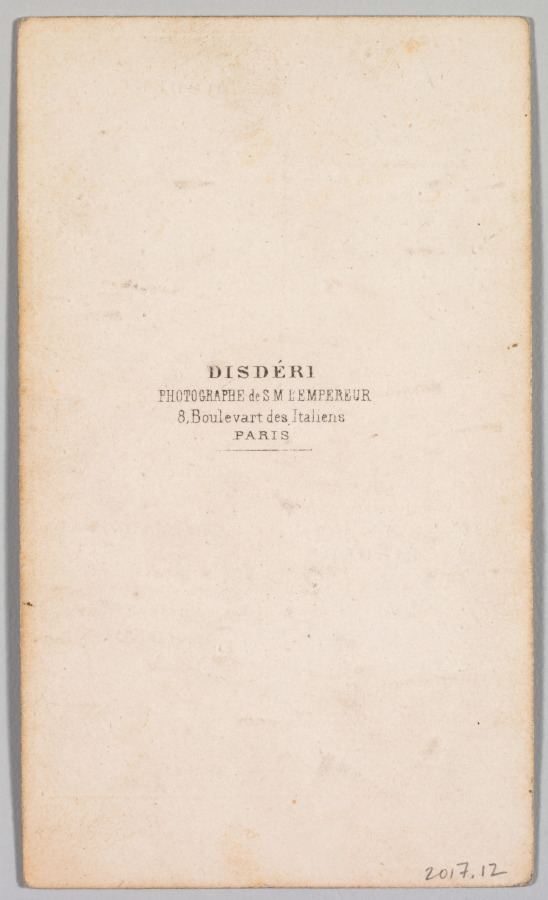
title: Untitled (French Military Heroes and Political Leaders)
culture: France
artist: André Adolphe-Eugène Disdéri (French, 1819–1889)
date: mid-1860s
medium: albumen print, montage carte-de-visite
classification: Photograph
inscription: Imprinted in black ink on recto: “Disdéri. Phot” Written in pencil on recto: “50 Euros” Imprinted in black ink on verso: “DISDERI/PHOTOGRAPHE de S.M. L’EMPEREUR/8, Boulevart des Italiens/PARIS”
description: This montage of France’s military and other leaders is a mosaic carte, a form invented by Disdéri, produced by cutting photographs of hundreds of figures away from their backgrounds, mounting the likenesses on a single sheet, photographing that collage, and printing the result on 6 x 9 cm cards. These entertaining images sold well and were effective advertising for the photographer’s prowess.